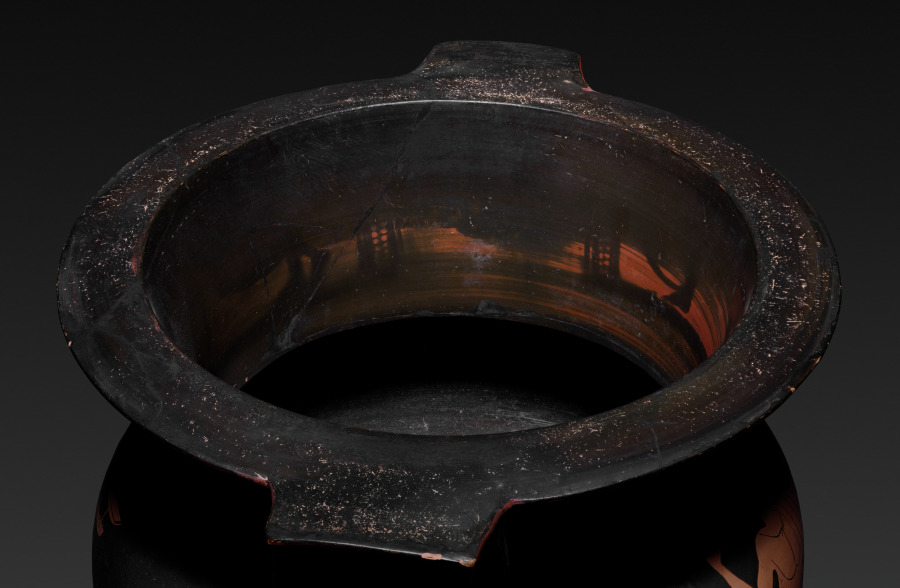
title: Red-Figure Column Krater (Mixing Vessel): Komos (Revel)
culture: Greek, Attic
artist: attributed to Pig Painter (Greek, Attic, active c. 480–460 BCE)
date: 470–460 BCE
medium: ceramic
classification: Ceramic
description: Used for mixing wine and water at a symposium (or drinking party), this column-krater speaks to the perils and pleasures of drinking. On one side, a bearded man holding a staff and a drinking cup leans forward, a red stream of vomit falling from his mouth. Before him is a nude young boy, holding a tortoiseshell lyre and a basket or pail. On the other side, a young man dances, holding a deep cup and wearing just one boot. On the neck above him, scratched in large letters, is the name SIMONOS, probably indicating that the vase once belonged to someone named Simon.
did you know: The bearded man on this vase is vomiting—perhaps a humorous warning against over imbibing.